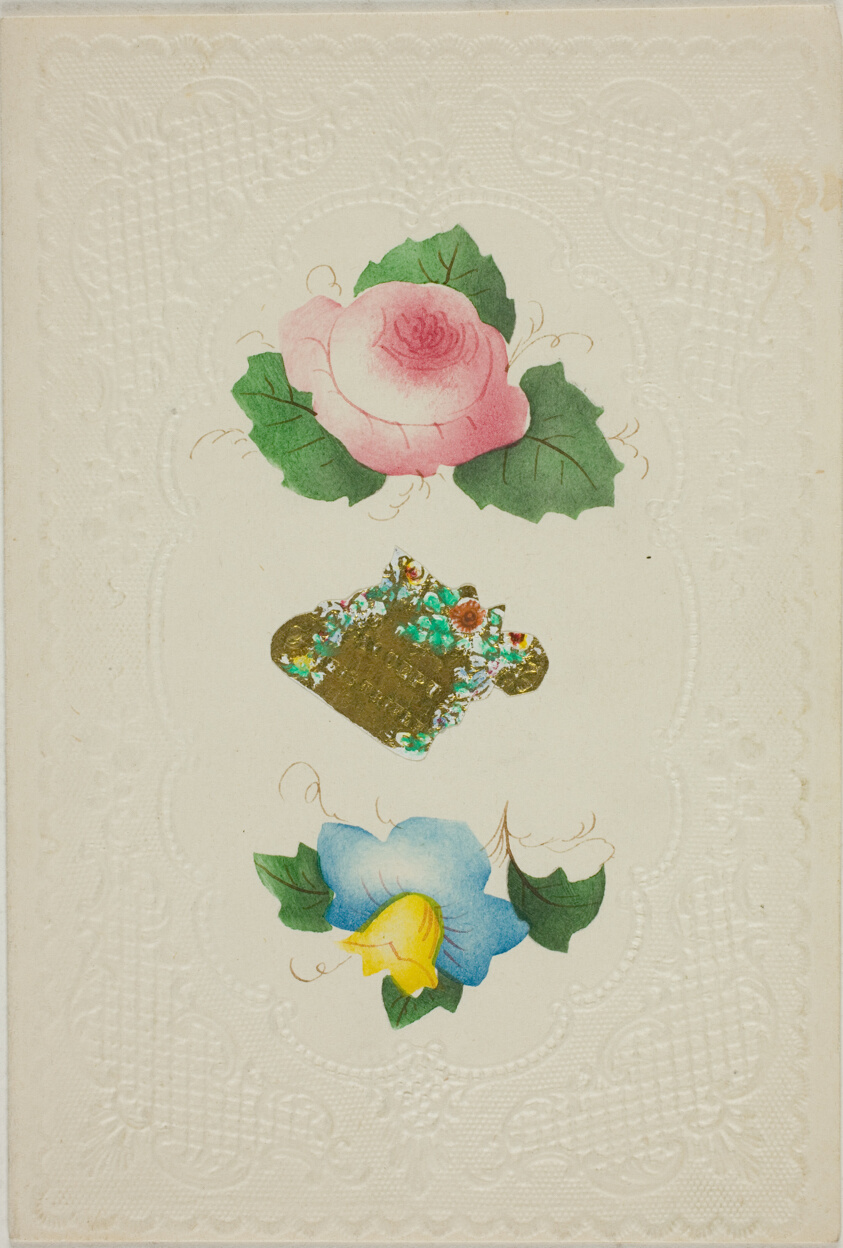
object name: Drawing and Watercolor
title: Accept this Trifle (valentine)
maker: Unknown Artist; English, 19th century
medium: Collaged elements with pen and black ink on embossed cream wove paper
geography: England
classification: valentine; prints and drawing; paper